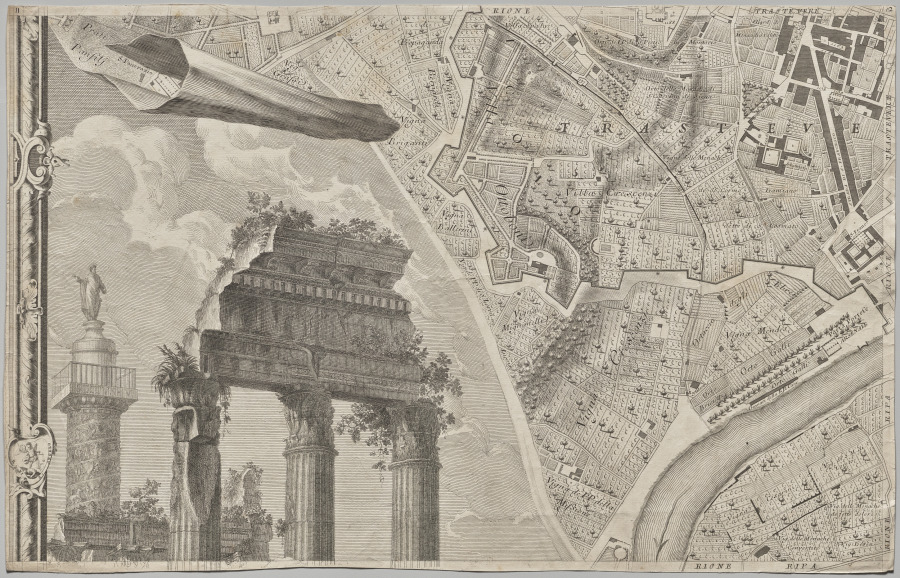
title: Nuova pianta di Roma data in luce da Giambattista Nolli l’anno MDCCXLVII, known as La Pianta Grande di Roma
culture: Italy, 18th century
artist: Giovanni Battista Nolli (Italian, 1701–1756)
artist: Carlo Nolli (Italian, 1690–1790)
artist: Rocco Pozzi (Italian, 1701–1774)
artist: Pietro Campana de Soriano (Italian, 1725–c. 1779)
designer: Stefano Pozzi (Italian, 1699–1768)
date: 1748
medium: etching and engraving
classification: Print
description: The monumental Pianta Grande di Roma, or Large Plan of Rome, which measures about 5 x 7 feet when its twelve plates are assembled, is a landmark in both cartography and printmaking. The map is considered the first scientific rendering of Rome, establishing new standards of accuracy and thoroughness when it was published in 1748. Devised by the Lombard architect and surveyor Giovanni Battista Nolli (Italian, 1701-56), the creation of the map required over ten years of surveying the city carried out by Nolli and a team of assistants with the help of new measuring devices. In Nolli’s “ichnographic” (also called “ground”) plan, architectural features and the urban infrastructure are reduced to a single horizontal slice, a minutely detailed footprint that conveys dimensions, proportions, and orientations to scale with the utmost clarity.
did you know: To make this map, Pope Clement XII granted the mapmaker permission to measure courtyards and other interior, inaccessible spaces in monastic communities, even those in nuns’ convents, which was controversial at the time.